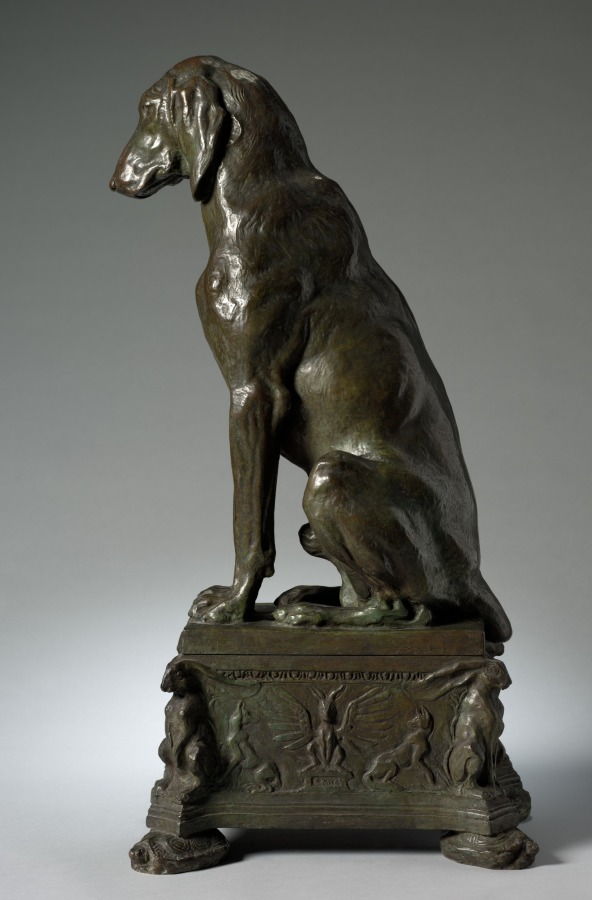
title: Hound (1 of 2)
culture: America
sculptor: Charles Cary Rumsey (American, 1879–1922)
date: 1912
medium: bronze andiron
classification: Sculpture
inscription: Signed on plinth: © C. C. Rumsey